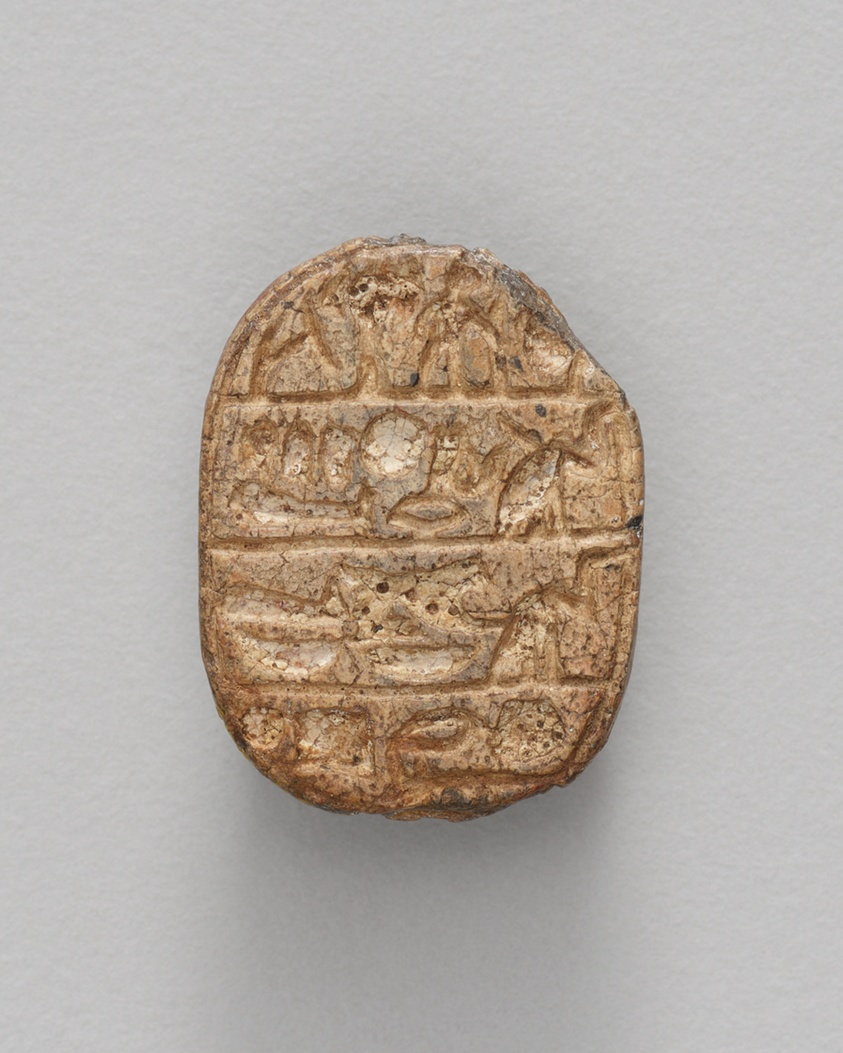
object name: Costume and Accessories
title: Scarab: Inscription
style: middle kingdom, egyptian, ancient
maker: Egyptian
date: Middle Kingdom (about 2055-1650 BCE)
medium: Steatite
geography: Egypt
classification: scarab; ancient art; costume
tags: Hieroglyphs